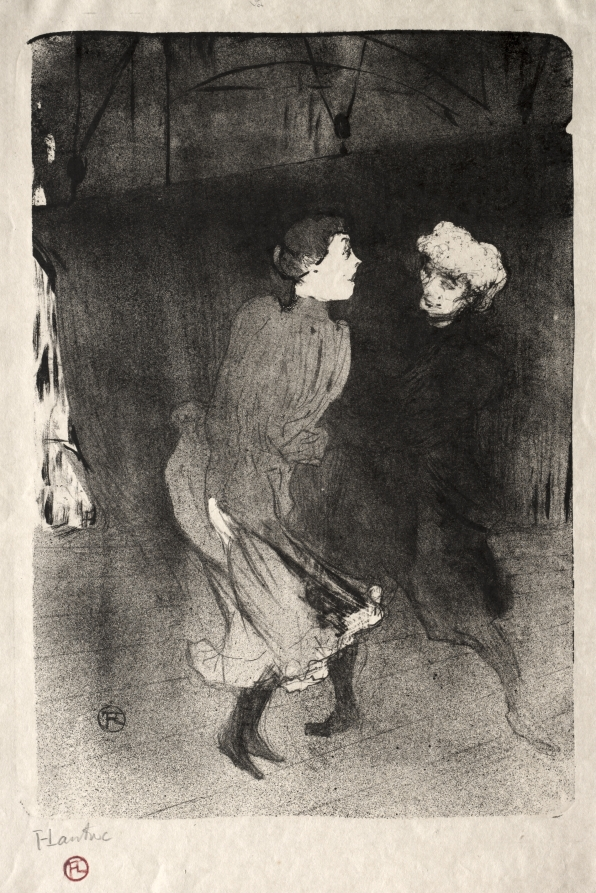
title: Emilienne d'Alecon and Mariquita of the Follies-Bergère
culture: France, 19th century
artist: Henri de Toulouse-Lautrec (French, 1864–1901)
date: 1893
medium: lithograph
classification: Print